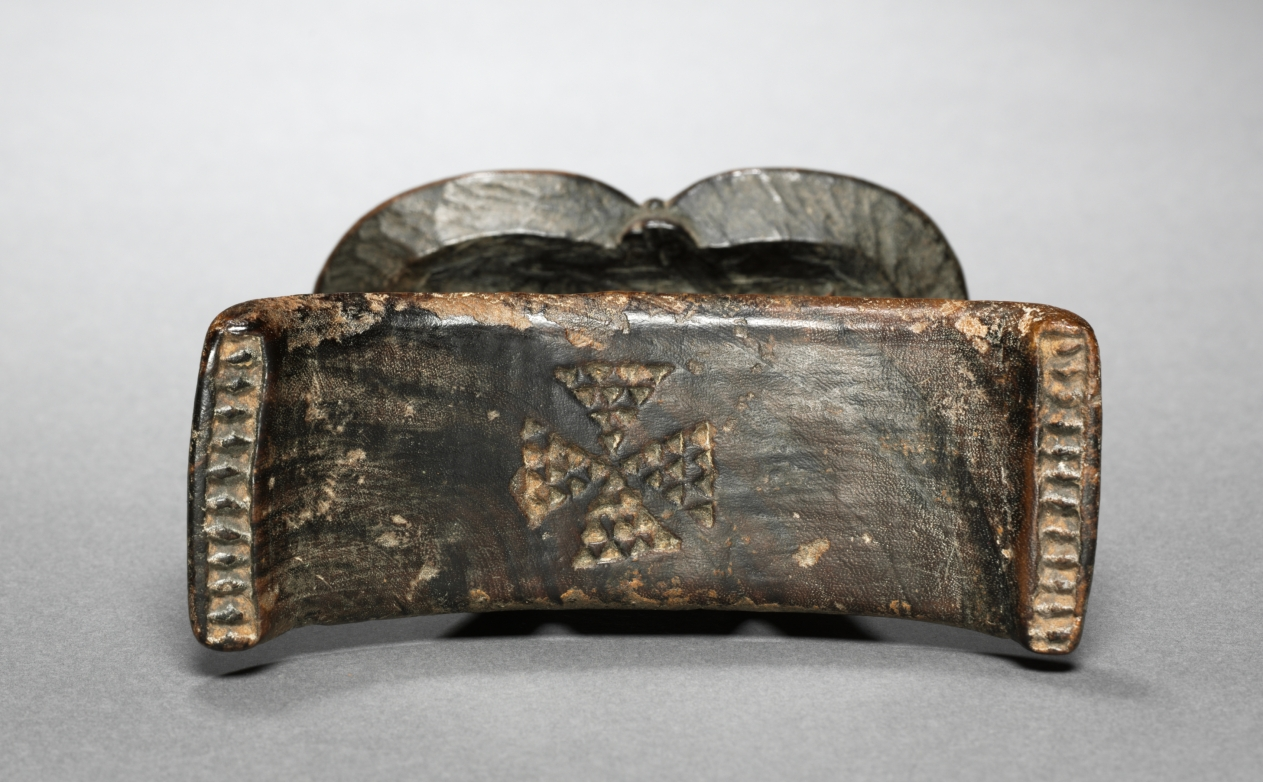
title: Headrest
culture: Africa, Southern Africa, Mozambique, Shona-style maker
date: 1900s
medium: Wood and colorant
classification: Furniture and woodwork